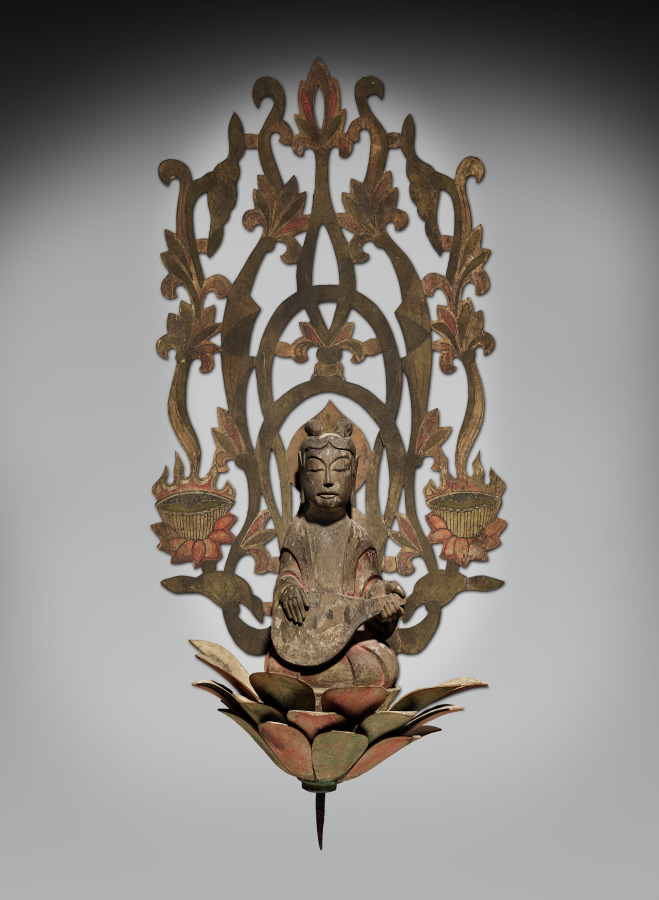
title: Replica of Heavenly Musician from Horyu-ji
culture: Japan, Edo period (1615–1868)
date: 1615–1868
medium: camphor (hinoki) wood with traces of polychromy in vermillion red, verdigris green, gesso white, and soot black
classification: Sculpture